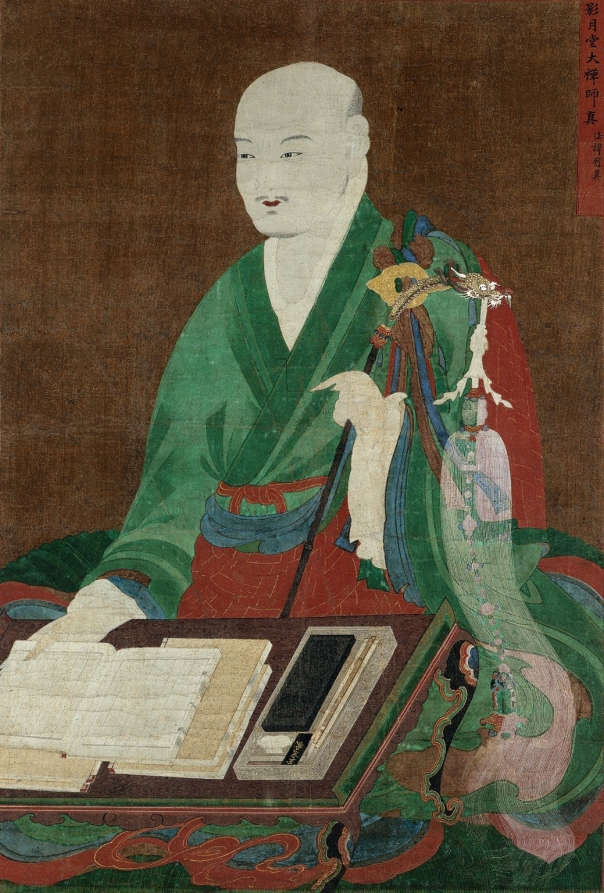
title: Portrait of the Great Master Yeongwoldang Eungjin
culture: Korea, Joseon dynasty (1392–1910)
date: 1700s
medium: hanging scroll, ink, color and gold on silk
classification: Painting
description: The monk in this portrait, identified by an inscription in a red cartouche at the upper right of this painting, is the Great Master Yeongwoldang Eungjin. Portraits of this type, painted following the death of an important Buddhist monk, are known as jinyeong. His elevated status is indicated by his fine monastic garments, the dragon-headed ceremonial fly whisk he holds in his left hand, and the Buddhist scripture in his right hand. The writing box on his desk, with brushes, ink stone, and water dropper, further emphasizes his prowess as a man of deep insight into the Buddhist teachings.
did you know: In East Asian Buddhist temples, portraits of Buddhist monks are housed in special dedicated halls as icons of spiritual ancestors to the community of Buddhist monks and nuns.